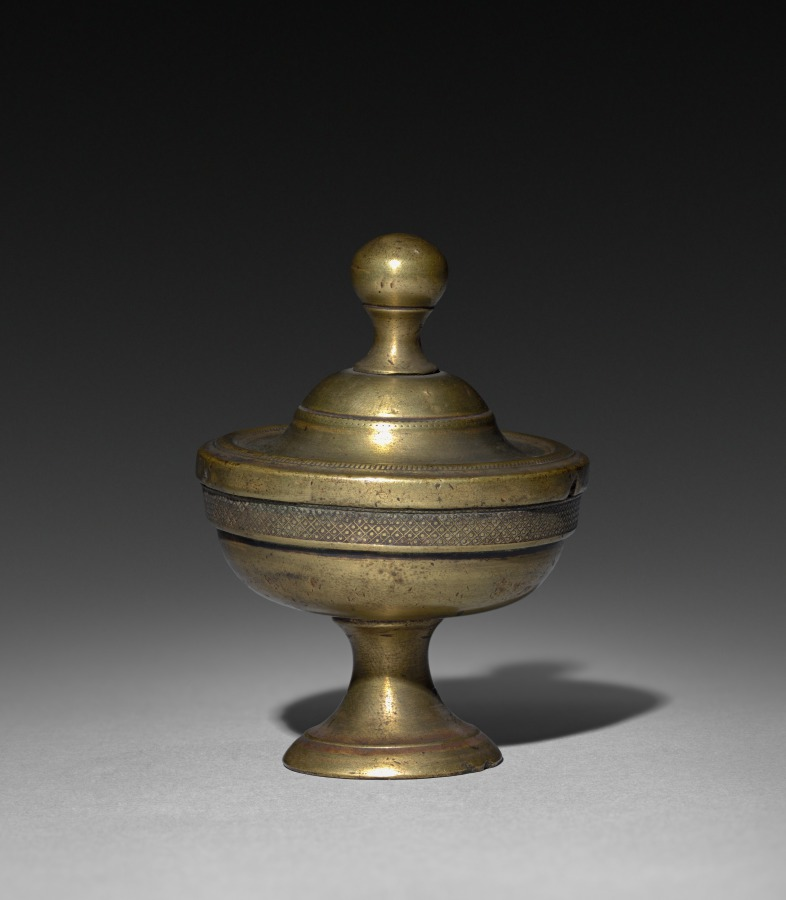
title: Ornamental Finial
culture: France, early 19th century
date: early 1800s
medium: bronze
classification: Metalwork